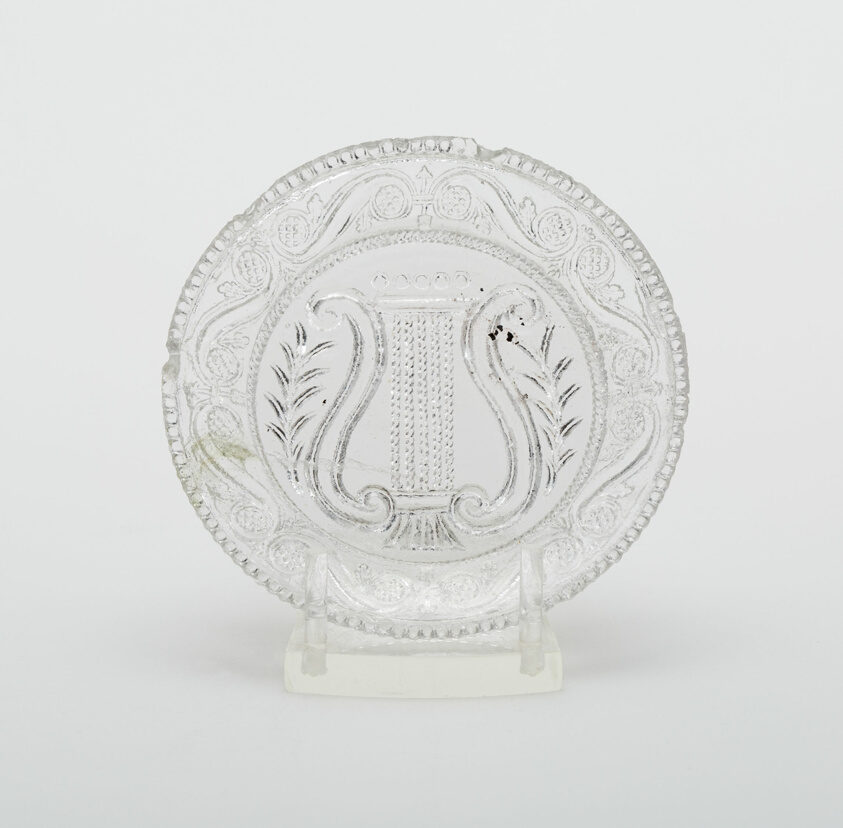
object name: Glass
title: Cup plate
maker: Artist unknown (American, 19th century); Midwest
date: c. 1850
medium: Pressed glass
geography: Midwest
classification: plate (general, dish); glass; american decorative arts; american arts; decorative arts